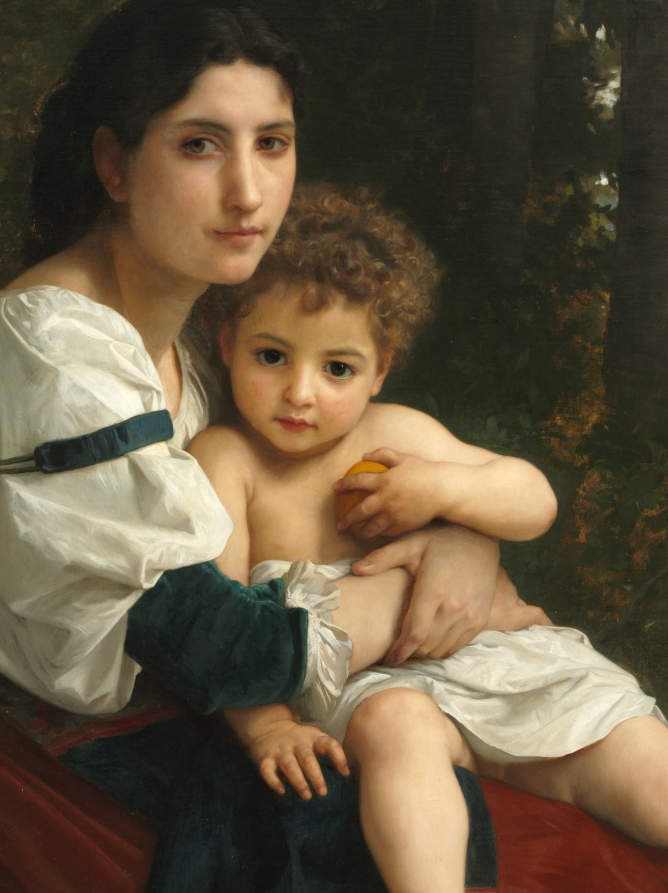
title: Rest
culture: France, 19th century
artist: William Adolphe Bouguereau (French, 1825–1905)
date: 1879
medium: oil on fabric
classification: Painting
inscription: Signed lower left: W. Bouguereau 1879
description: One of the most celebrated academic painters of his time, Bouguereau underscores the moral virtues of the Italian peasants in this painting by depicting the dome of St. Peter's in the distance. The idealized figures and their triangular grouping recall the Holy Family paintings by Renaissance master Raphael 400 years earlier. The painting was purchased directly from the artist by Cleveland banker and philanthropist Hinman B. Hurlbut in July 1879.